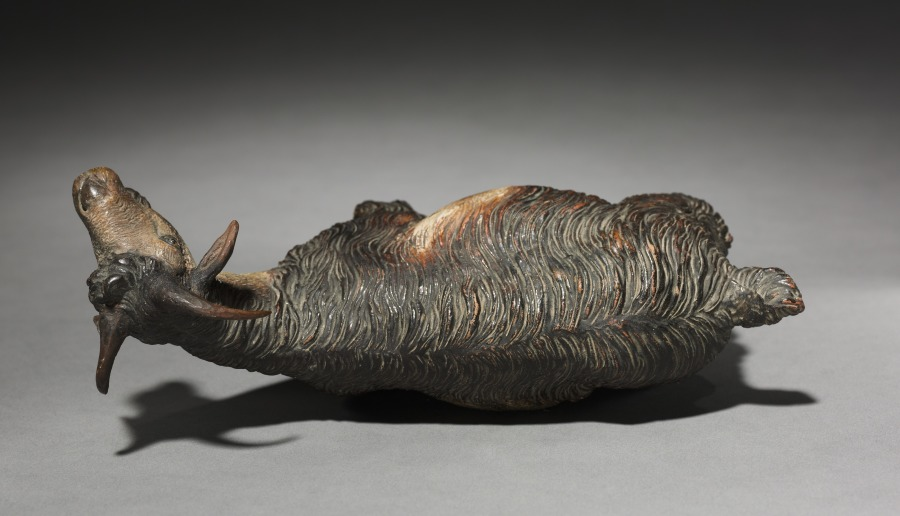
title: Figure from a Crèche: Standing Mountain Goat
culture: Italy, Naples, late 18th-early 19th century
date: 1780–1830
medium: painted wood and terracotta with various textiles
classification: Sculpture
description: The practice of creating scenes of the Nativity for the home dates from the early 1700s in Italy, where people began to set up doll-like figures of about a foot or less in height. The custom was particularly popular in Naples around 1800, where crèche scenes (crèche means cradle, or crib) included many figures, whose heads and hands of painted terracotta, stuffed cloth bodies, and clothing adapted from contemporary local costumes gave them an amazingly realistic character. Representations of the birth of Jesus can be traced to the first few centuries of Christianity. Both living creatures and sculptural depictions of them were used from early times. By the late middle ages it was customary to create life-size figures of wood or stone, naturalistically painted, to represent the characters who participated in the events of Jesus's early life. These sculptures were then arranged in scenes illustrating one or both of the most important of these events, the Adoration of the Shepherds and the Adoration of the Magi-the three kings from the East who came to pay homage to the Christ child. Used in churches, these large figures were especially popular in Italy, Central Europe, Spain, and Portugal. This Object in Focus presentation was organized by Henry Hawley, Curator of Renaissance and Later Decorative Arts and Sculpture.